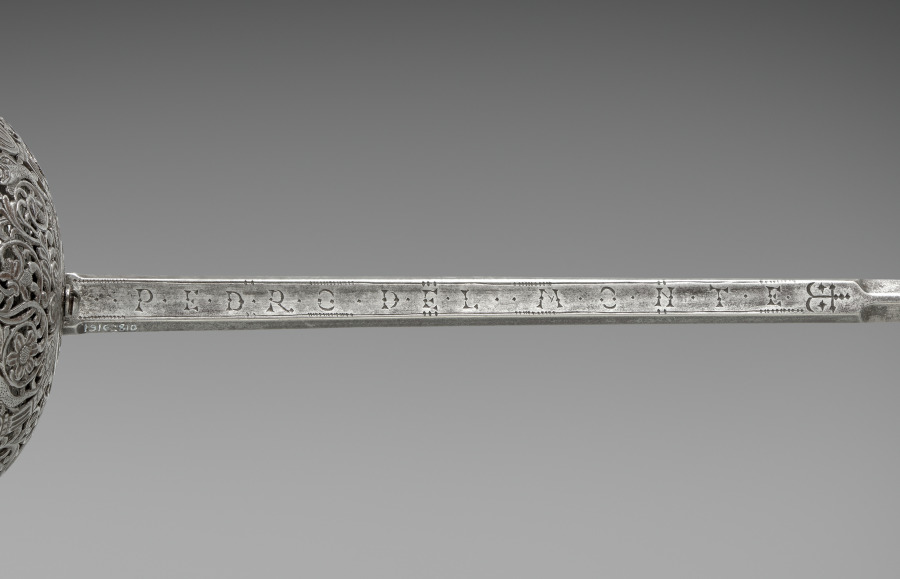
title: Cup-Hilted Rapier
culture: Spain, Toledo, 17th century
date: c. 1650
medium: Pierced and chiseled steel;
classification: Arms and Armor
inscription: PEDRO DEL MONTE/ IN TOLEDO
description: For parrying, rapiers were often made with accompanying daggers as a matched set. The aristocracy's taste for rich and intricate styles of decoration led to extravagant gilding, chiseling, piercing, enameling, and silvering. The more costly or unusual these weapons appeared, the more they were desired by the clientele who commissioned them, not only for dueling but also as the ultimate accessory.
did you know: The guard is richly decorated with chiseled and pierced arabesques, an ornamental design consisting of intertwined flowing lines.